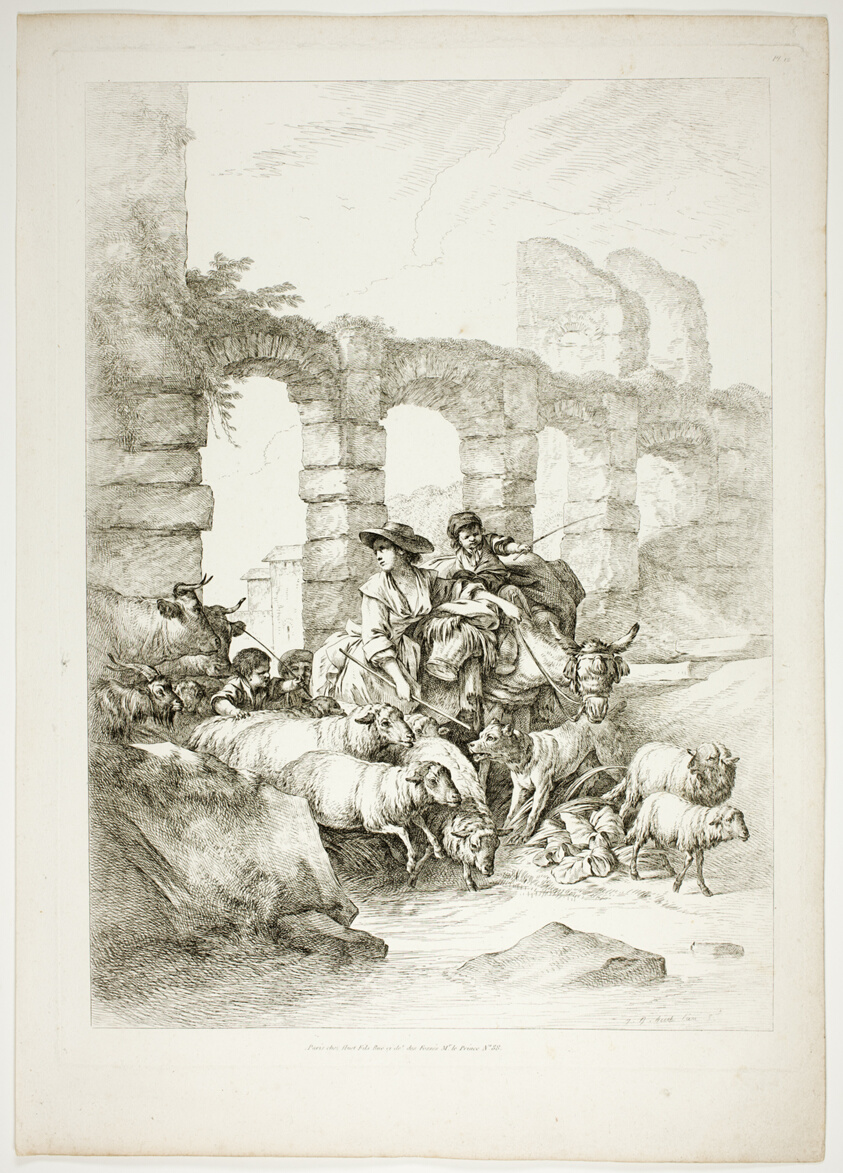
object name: Print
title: Plate Twelve of 38 from Oeuvres de J. B. Huet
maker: Jean Baptiste Huet (French, 1745-1811)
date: 1796–99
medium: Etching on paper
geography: France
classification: etching; print; prints and drawing